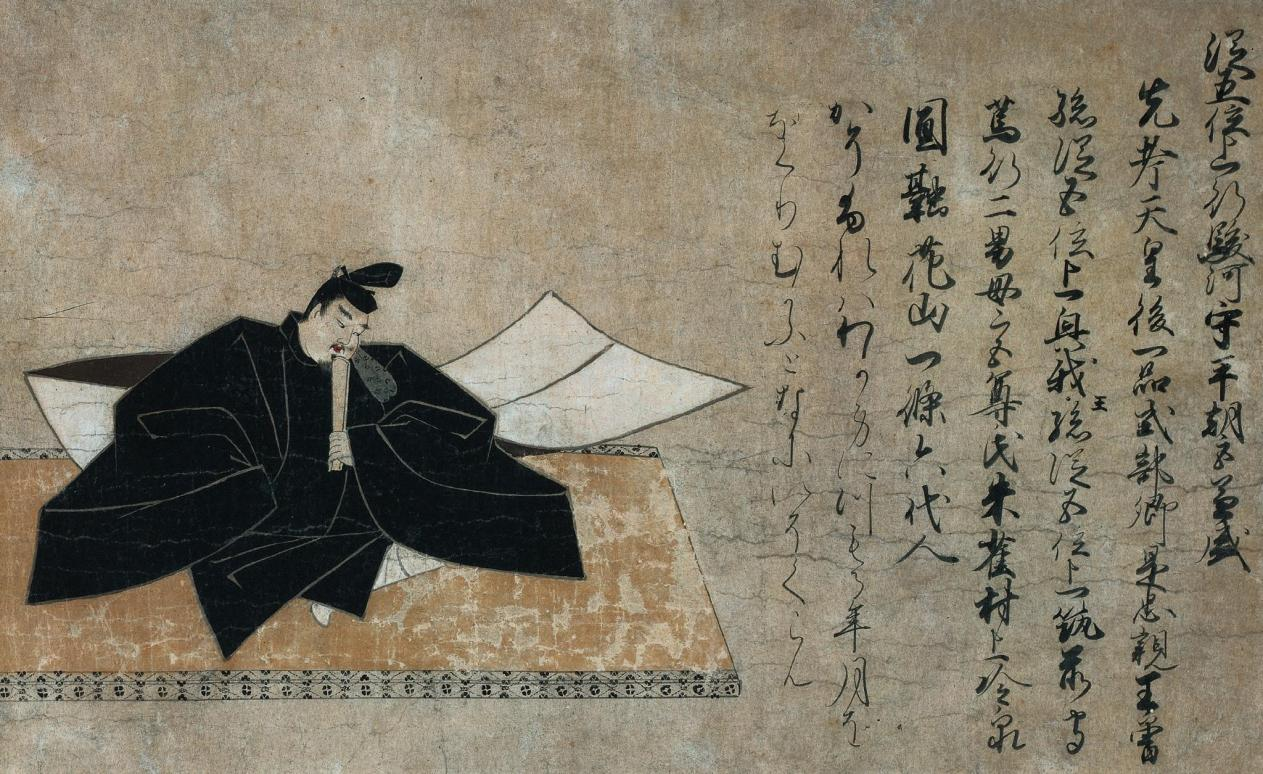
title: Taira no Kanemori of the Thirty-Six Poetic Immortals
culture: Japan, Kamakura period (1185–1333)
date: 1200s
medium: Section of a handscroll mounted as a hanging scroll; ink and color on paper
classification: Painting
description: Taira no Kanemori was one of the 36 poetic immortals of classical Japanese literature. This painting is a fragment of what was once a handscroll depicting all 36 poets.